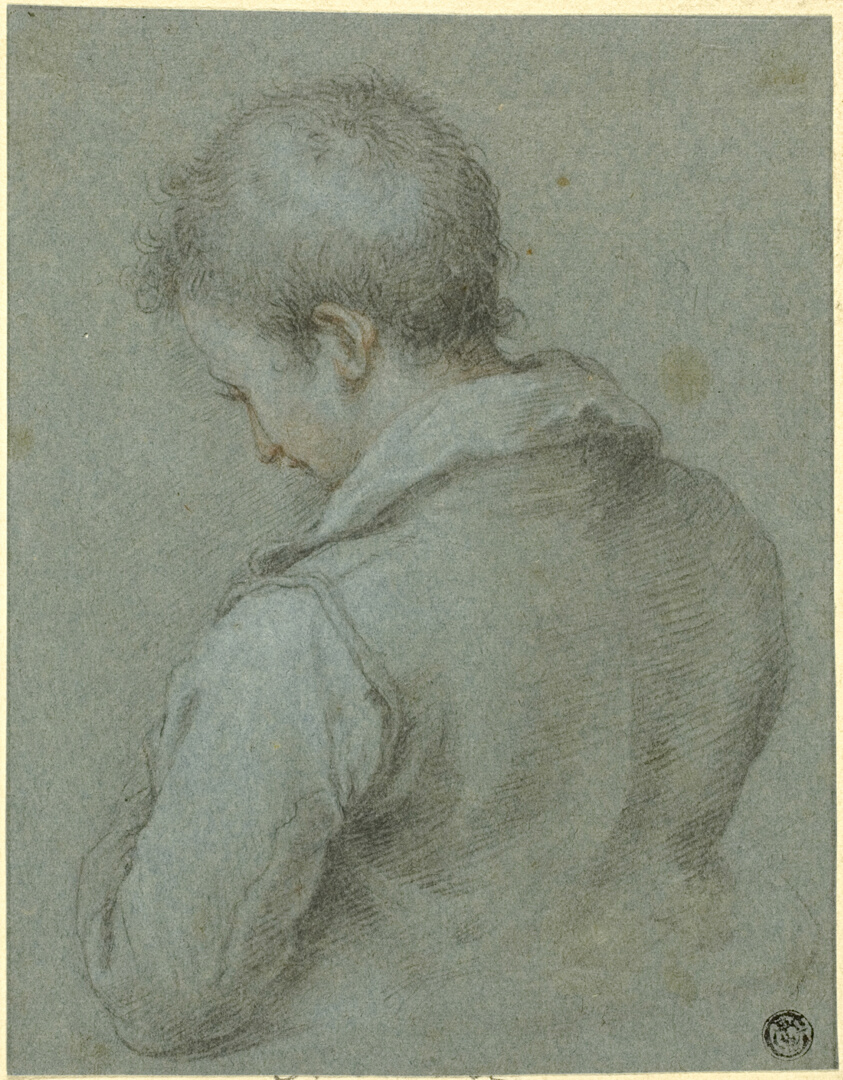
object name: Drawing and Watercolor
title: Head and Shoulders of a Man seen from the Back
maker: Attributed to Oliver Isaac, the elder (French, before 1568-1617); possibly after Ottavio Mario Leoni (Italian, 1578-1630)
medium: Red and black chalk, heightened with white chalk, on blue paper, laid down on ivory laid paper, tipped onto card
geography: France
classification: chalk; drawings (visual works); prints and drawing